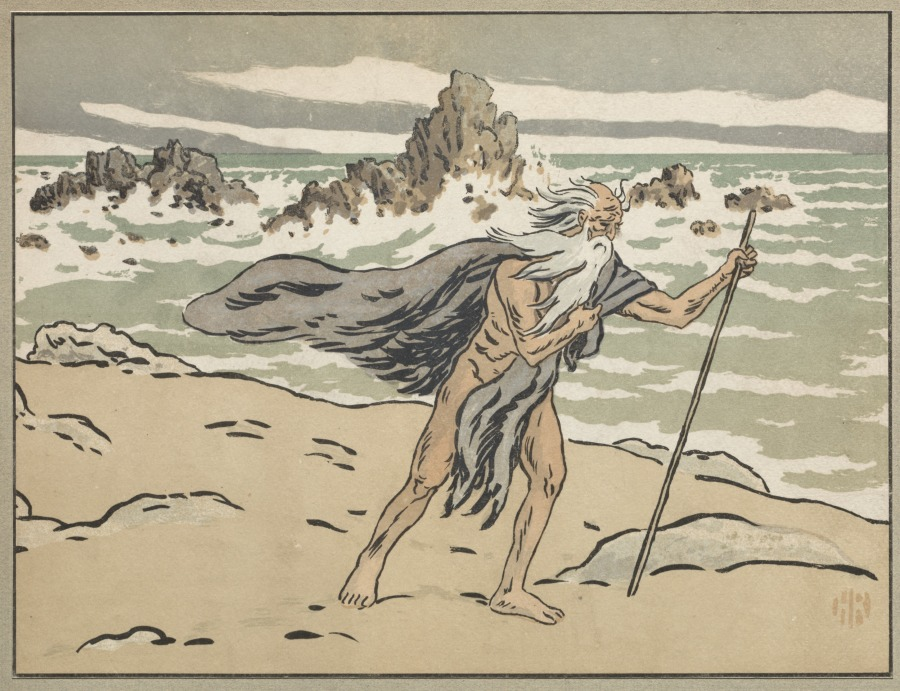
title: The Wandering Jew: Cover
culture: France, 19th century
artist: Henri Rivière (French, 1864–1951)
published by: Verneau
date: 1896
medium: color lithograph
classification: Portfolio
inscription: title page is signed, in blue crayon: Henri Rivière